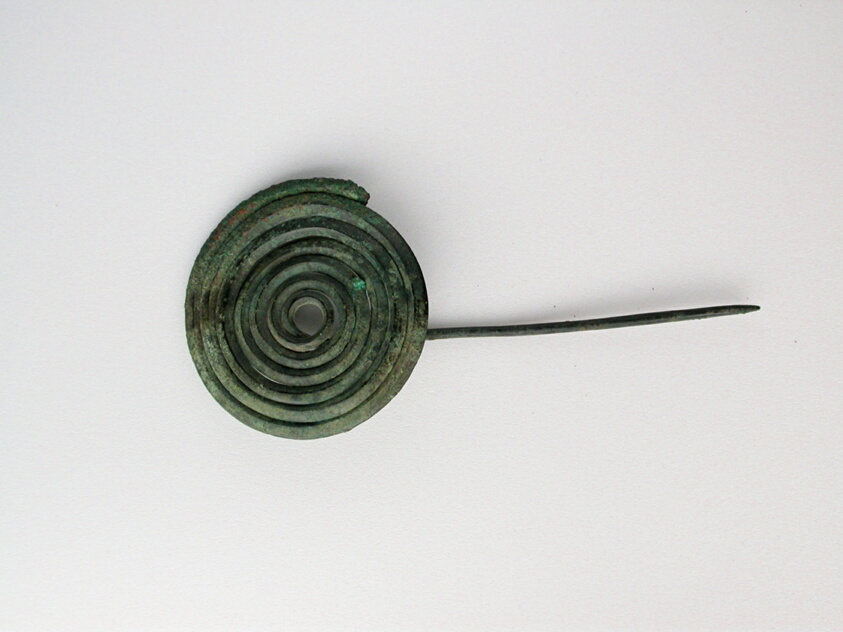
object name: Costume and Accessories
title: Spiral Fibula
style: geometric, ancient, greek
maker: Greek; Thessaly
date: Geometric Period (800–700 BCE)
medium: Bronze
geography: Thessalía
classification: votive offering; ex-voto; fibula; costume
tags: spiral